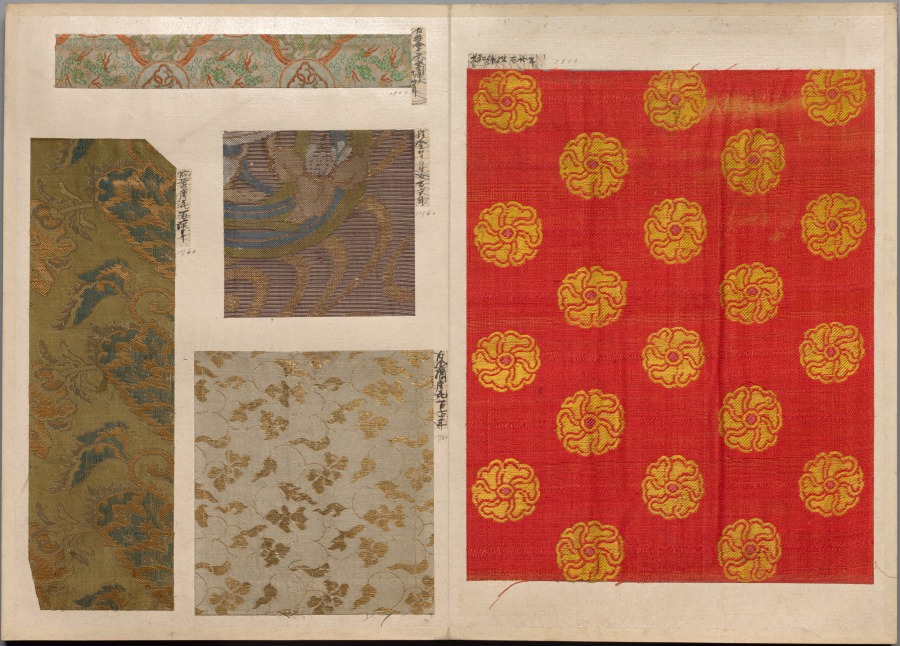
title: Album of Textile Samples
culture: Japan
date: 1790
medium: silk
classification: Textile